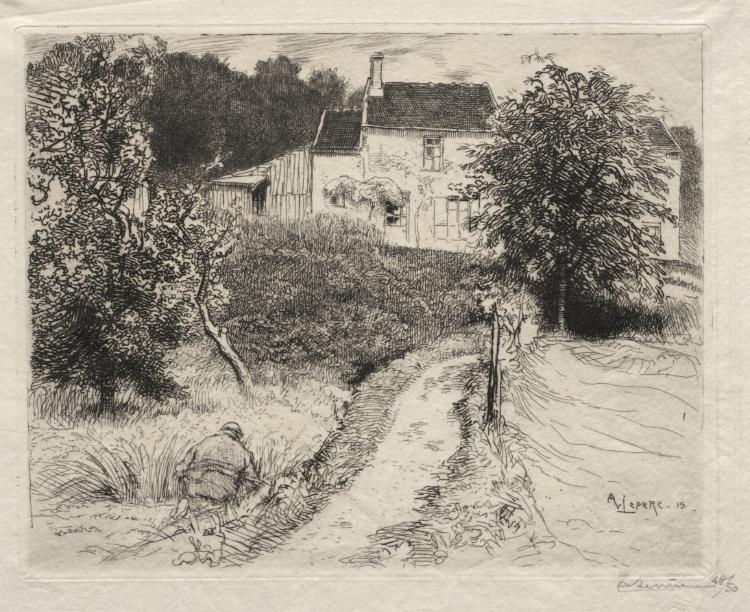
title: A Bellot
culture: France, 20th century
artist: Auguste Louis Lepère (French, 1849–1918)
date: 1915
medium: etching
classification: Print